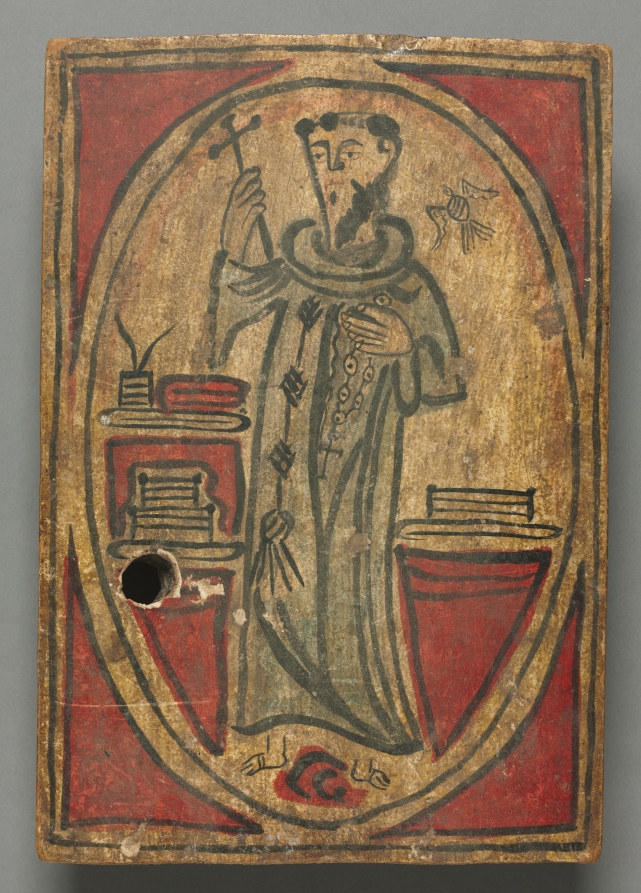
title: San Francisco de Assisi: santo de retablo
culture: America, New Mexico, 17th-18th century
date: 1600s-1700s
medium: oil on wood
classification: Painting